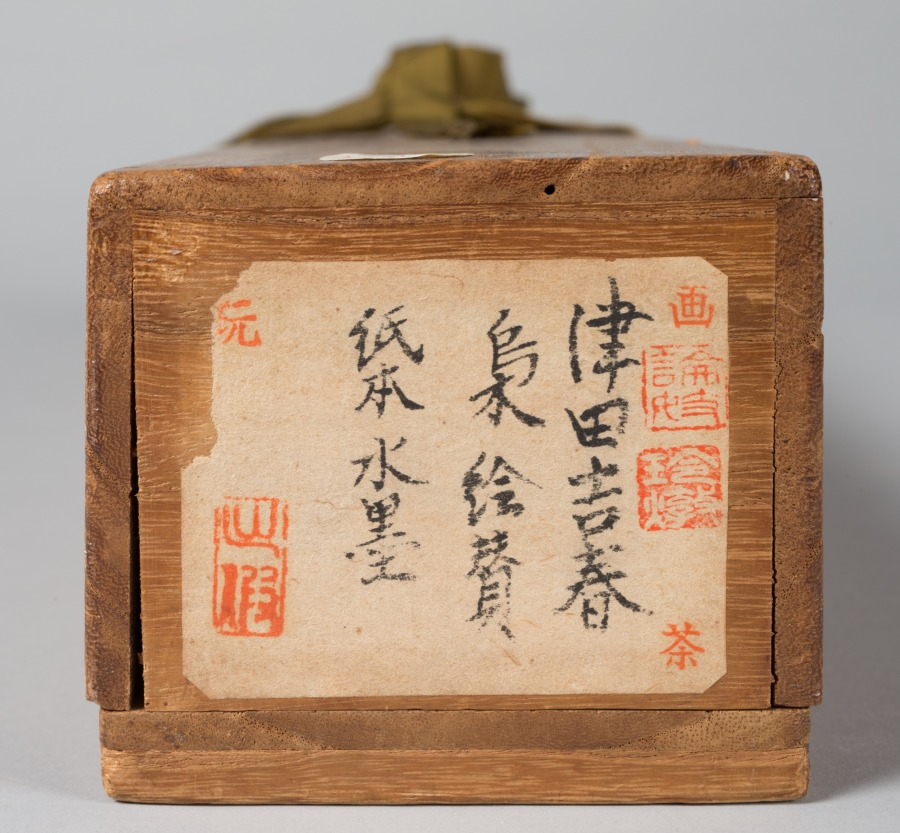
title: Owl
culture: Japan, Edo period (1615–1868)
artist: Tsuda Bensaku (Japanese, active 1620s–40s)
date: 1630s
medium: hanging scroll; ink and slight color on paper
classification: Painting